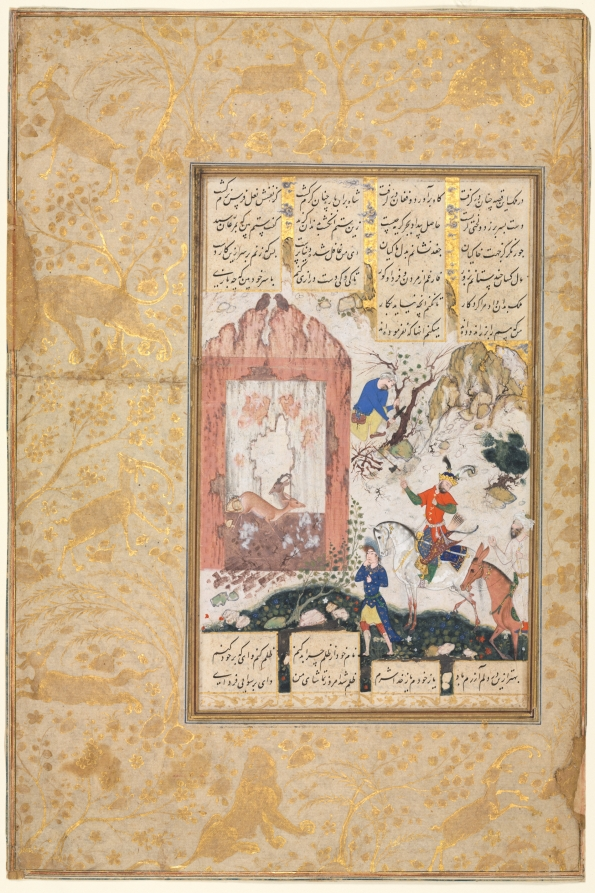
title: Nushirwan Listens to the Owls (recto): Illustration and Text, Persian Verses, from a Manuscript of the Khamsa of Nizami, Makhzan al-Asrar [Treasure of Secrets]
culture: Iran, Qazvin, Safavid period (1501-1722)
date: 1555–65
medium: opaque watercolor, ink, and gold on paper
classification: Manuscript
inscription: script: Nasta'liq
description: This scene is from the Makhzan al-Ashrar, the first of the Quintet. Although more historically oriented than the following poems, it served more as a vehicle for moralizing tales than for historical events. In this scene Nushirwan asks the sage Buzurgmihr to explain what the owls perched on a ruined building are saying. He explains that one owl is offering the other as many ruined cities as he likes in exchange for his daughter's hand. He thus reproves Nushirwan for his love of conquest and war and the consequent destruction of many cities.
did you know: King Nushirwan is on a white horse, while his minister Buzurjmihr is riding a mule.